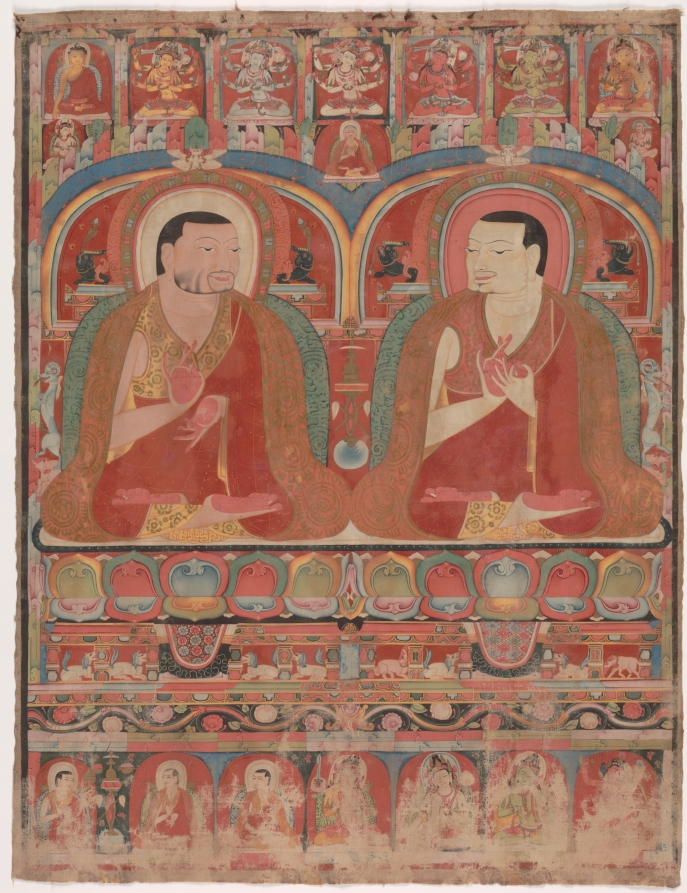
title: Portraits of Two Lineage Masters of the Kagyu Order: Phagmo Drupa (1110–1170) and Tashipel (1142–1210)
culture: Central Tibet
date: c. 1236–1310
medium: Gum tempera on sized cotton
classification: Painting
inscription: [1] ōṃ ŌṂ [2] sa rva vyid [3] svā hā// ōṃ [4] su pra ti ṣṭha vajra [5] svā hā// ye dha [6] rma he tu pra bha vā he tun te śan [7] ta tha ga to hya va tad de ṣan ca [8] yo ni ro dha ye vaṃ vā [9] ti ma [hā] śra [ma] ṇa// bzod [10] pa dka’ A thub bzod [11] daṃ pa ni[//] mya ngan ’das [12] ces sangs rgyas gsung// [13] rab tu byung ba gzhan la gnod pa ni dang// [14] gzhan la ’tshe HŪṂ ba de ni dge sbyong ma [15] yin no//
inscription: [1] ōṃ ŌṂ [2] sa rva vyid svā [3] hā// ōṃ su pra [4] ti ṣṭha vajra svā hā// [5] ye dha rma he tu pra bha vā he tun te śan ta tha ga to [6] hya va tad de ṣan ca yo ni ro dha e vaṃ vā ṭi ma hā [7] śra ma na ye// bzod pa dka’ thub [8] bzod pa daṃ pa ni// mya ngan pa [9] ’das ces A sangs rgyas gsung: [10] rab tu byung ba gzhan la gnod pa dang[//] gzhan la ’tshe ba [11] de ni dge sbyong ma yin HŪṂ no// ōṃ ma ni pad me hūṃ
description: High-level leaders of Buddhist monastic institutions were frequent portrait subjects of early thangka painting (devotional cloth scrolls) in Central Tibet. The lama (Tibetan monk) on the right founded Taklung Monastery in Lhasa, the capital of Tibet, which became an important institutional center of the Kagyu order. He is shown in discourse with his predecessor, whose teacher Gampopa (1079–1153), in turn, is the tiny gray-haired lama centered above them, between the colorful stylized mountain ranges. Their halos, lotus pedestal, and thrones with spitting elephant-trunked crocodiles and rearing griffins elevate them to the level of Buddhas and bodhisattvas. Despite their deification, they are still depicted with individualized facial features.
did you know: The Five Cosmic Buddhas in their six-armed forms are aligned at the top.